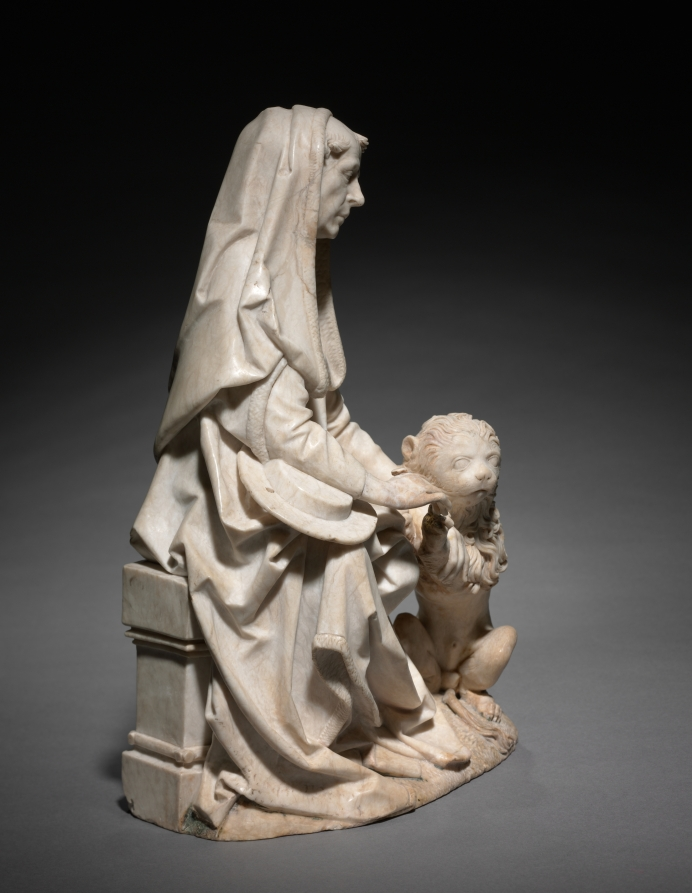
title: Saint Jerome and the Lion (From the former Church of St. Peter in Erfurt)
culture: Germany, Würzburg, late 15th Century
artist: Tilman Riemenschneider (German, active Würzburg, c. 1460–1531)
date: c. 1495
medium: alabaster, traces of polychromy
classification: Sculpture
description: According to legend, Saint Jerome (347–420 bce) lived in the desert, where he removed a thorn from an injured lion. Jerome is venerated in the Catholic Church as a Church Father, an important early author of Christianity. Here, he wears cardinal’s clothing from around 1500. Tilman Riemenschneider focused on Jerome’s relationship with the lion, creating empathy for the wounded animal. The delicacy of the depiction, which may have been partially painted to add highlights, is typical of alabaster, as is its fine polishing. The cord of the cardinal’s hat, missing today, may have been supplemented from another material.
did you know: In the story Saint Jerome encounters a fearsome lion, here depicted as diminutive, gentle, and submissive.